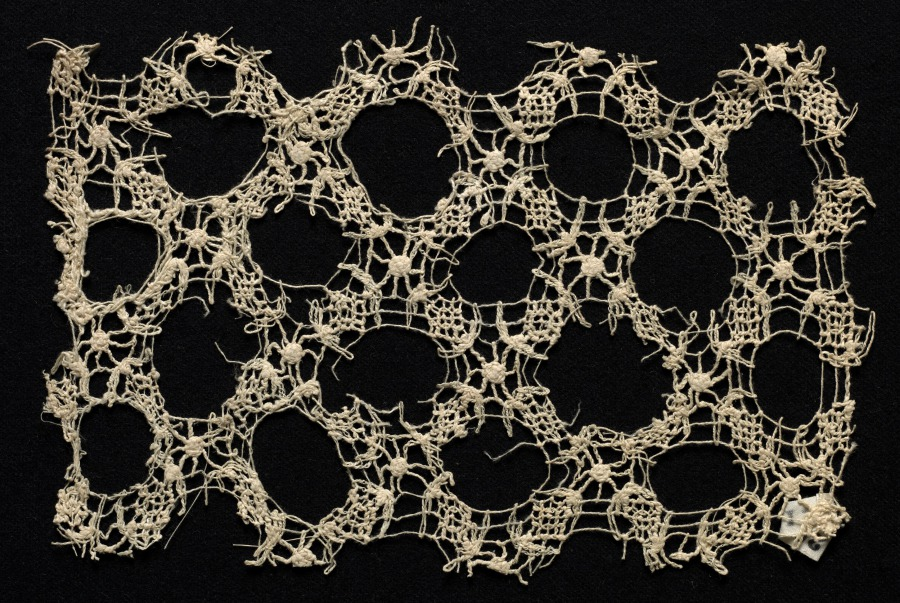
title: Fragment with Wide Circular Pattern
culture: Italy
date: 1500s–1600s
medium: Bleached linen (est.): needle lace, mezza mandolina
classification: Lace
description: The mezza mandolina technique produces an irregular mesh netting, as opposed to the uniform knotted netting of filet/lacis needle lace. This piece gains the overall effect of the mesh netting through the lace maker’s use of large and small circular patterns.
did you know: Mezza mandolina was frequently used for lace collars, often depicted in portraits of women from the 1500s and 1600s.